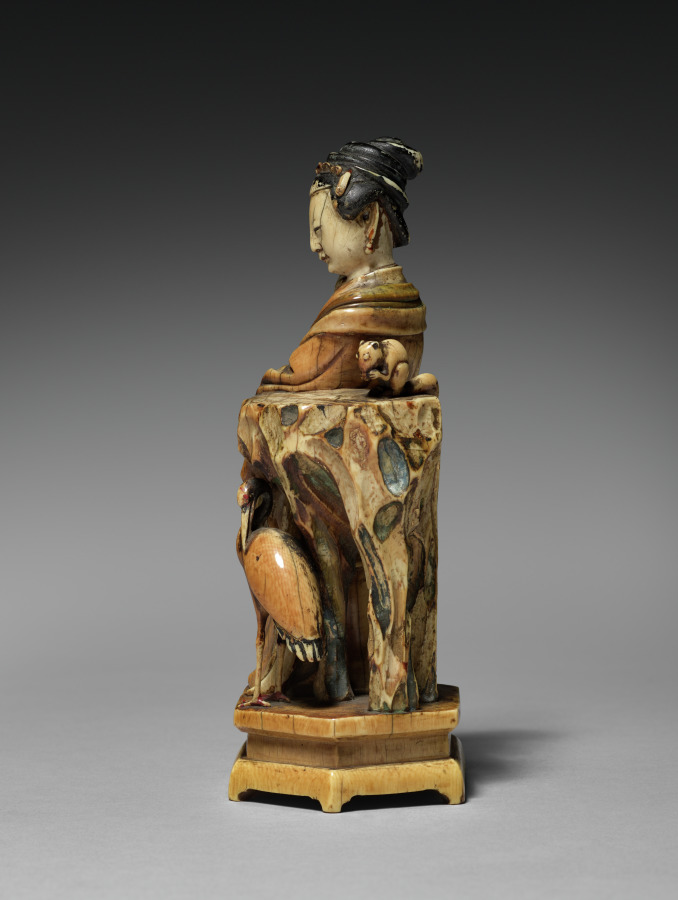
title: Female Figure with Crane and Squirrel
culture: China, Qing dynasty (1644-1911), Kangxi reign (1662-1722)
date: 1662–1722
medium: ivory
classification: Ivory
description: In the Qing dynasty (1644–1911), luxury items became more affordable to larger parts of the society, including women, merchants, and literati in non-official positions. Imperial patronage and a growing urban population encouraged consumption of luxury goods and local craftmanship. This ivory form of a woman with a crane illustrates the superb skills and the creative mind of the talented artisan who sought clients on a competitive market.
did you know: The ivory has aged to a rich amber, while traces of its original red and green paint remain on the woman’s cuffs and collar.